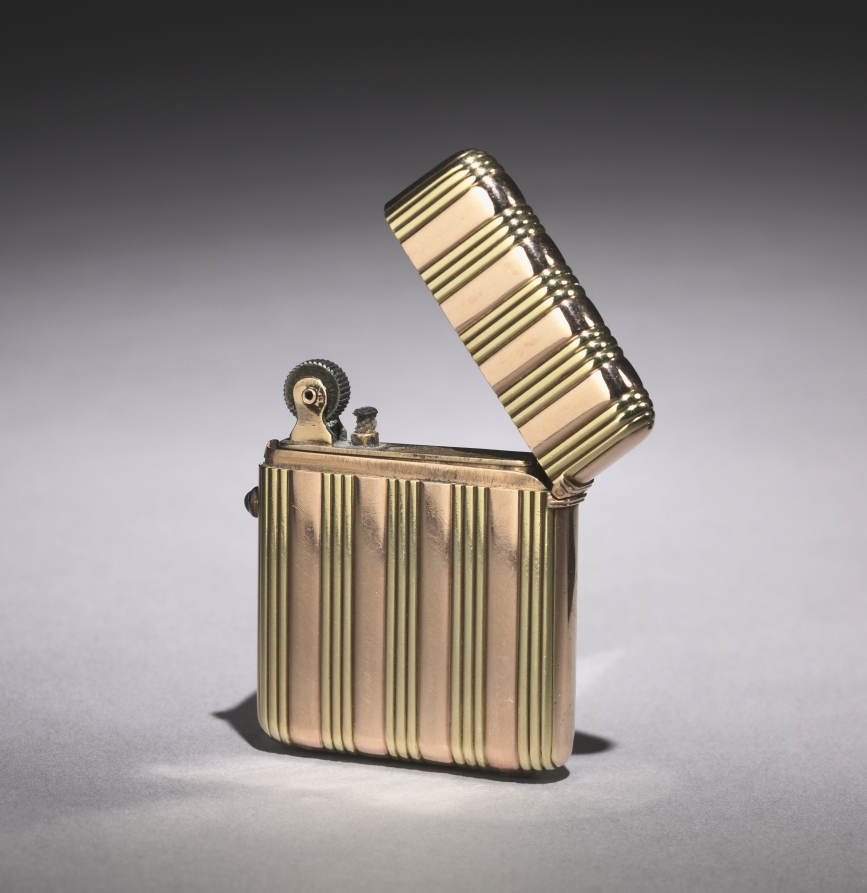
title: Match Case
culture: Russia, St. Petersburg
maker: House of Fabergé (Russian, 1842–1918)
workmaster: Anders Johan Nevalainen (Finnish, 1858–1933)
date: c. 1900–1910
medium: pink and yellow gold, cabochon sapphire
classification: Miscellaneous